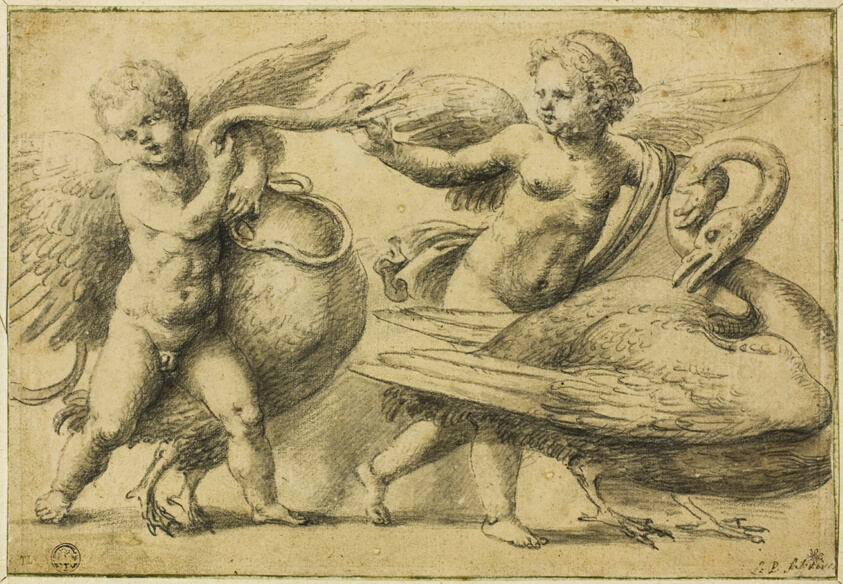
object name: Drawing and Watercolor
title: Putti Playing with Swans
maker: Circle of Raffaello Sanzio, called Raphael; Italian, 1483-1520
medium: Black chalk with brush and gray wash, on tan laid paper, laid down on ivory laid paper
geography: Italy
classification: chalk with wash; drawings (visual works); prints and drawing